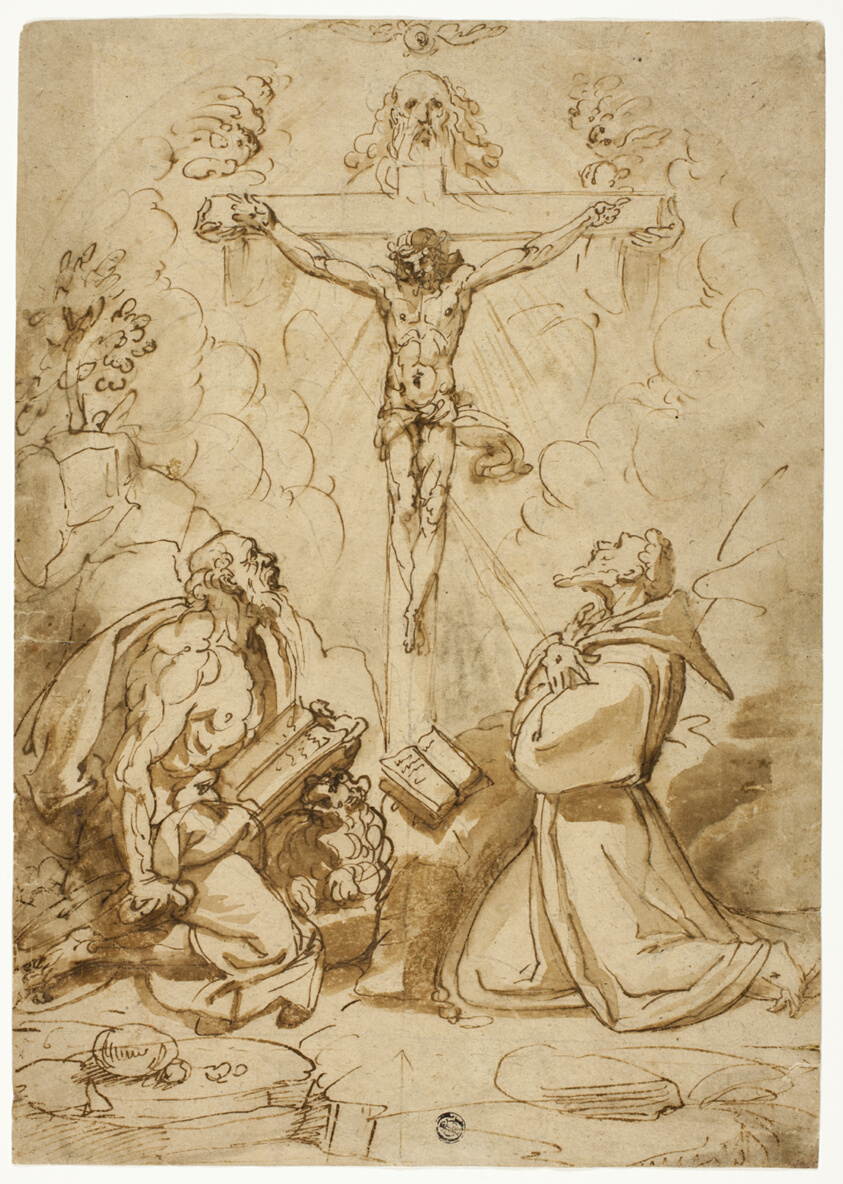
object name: Drawing and Watercolor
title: Saints Jerome and Francis of Assisi Adoring the Trinity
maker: Bartolomeo Passarotti (Italian, 1529-1592)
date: c. 1570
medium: Pen and brown ink with brush and brown wash, over graphite, on tan laid paper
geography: Italy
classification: ink with wash; drawings (visual works); prints and drawing